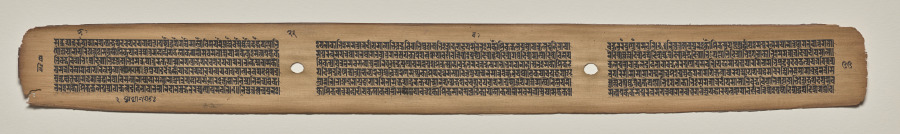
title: Text, Folio 22 (verso), from a Manuscript of the Perfection of Wisdom in Eight Thousand Lines (Ashtasahasrika Prajnaparamita-sutra)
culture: Eastern India, Bihar, Vikramashila Monastery. Painting: Nepal, Kathmandu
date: Sunday, September 14, 1119 (year 239 of the Newar Samvat in the month of Ashvina)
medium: gum tempera and ink on palm leaves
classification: Painting